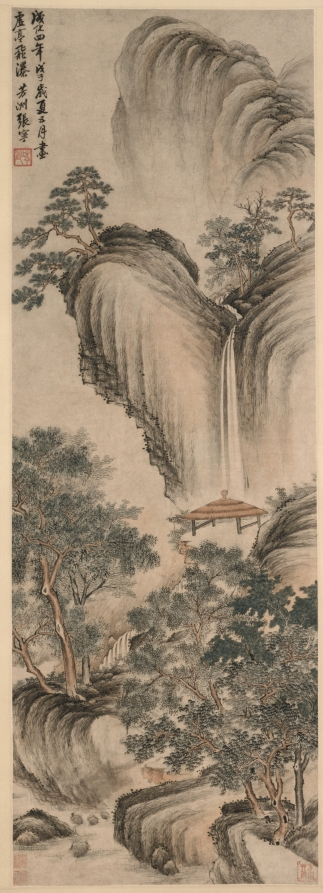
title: Empty Arbor and Rapid Waterfall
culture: China, Ming dynasty (1368–1644)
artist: Zhang Ning (Chinese, 1426-c. 1495)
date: 1468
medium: hanging scroll, ink and color on paper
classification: Painting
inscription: Artist's inscription, signature, and 2 seals: Painted in the summer, the fifth month of the wu-tzu year, the fourth year of the Ch'eng-hua era [1468]. Empty Arbor and Rapid Waterfall. Fang-chou, Chang Ning [seals] Ching-chih; Fang-chou ts'ao-t'ang. 2 additional seals: 1 of Ch'eng Ch'i; 1 unidentified.